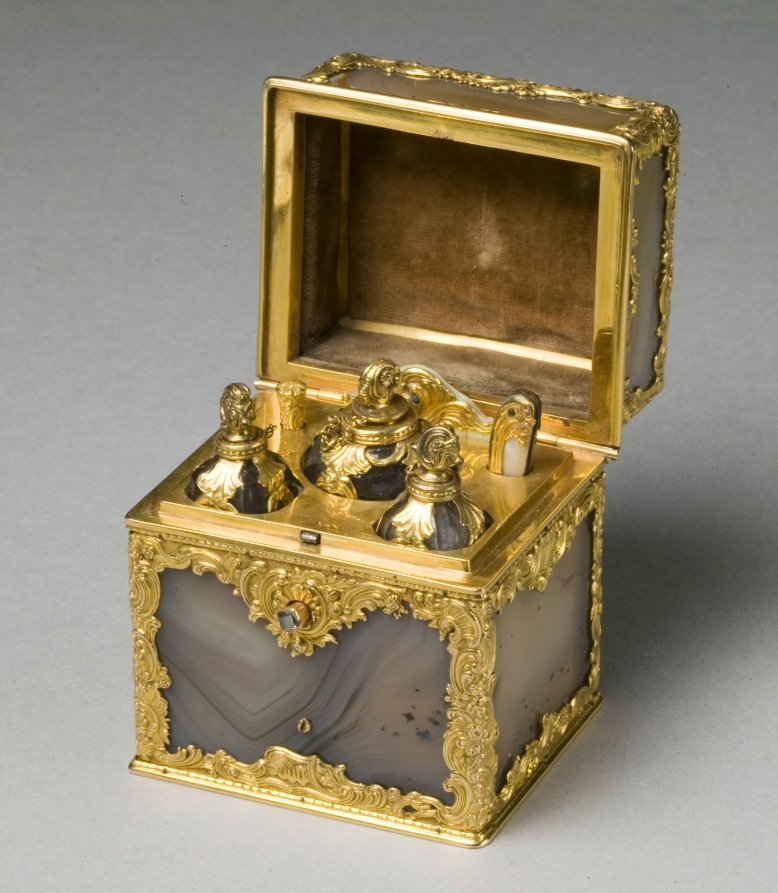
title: Writing Case (Nécessaire)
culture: England, mid 18th century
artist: attributed to James Cox (British)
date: c. 1760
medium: agate, gold and diamond. mounted with 18 KT gold cagework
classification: Miscellaneous